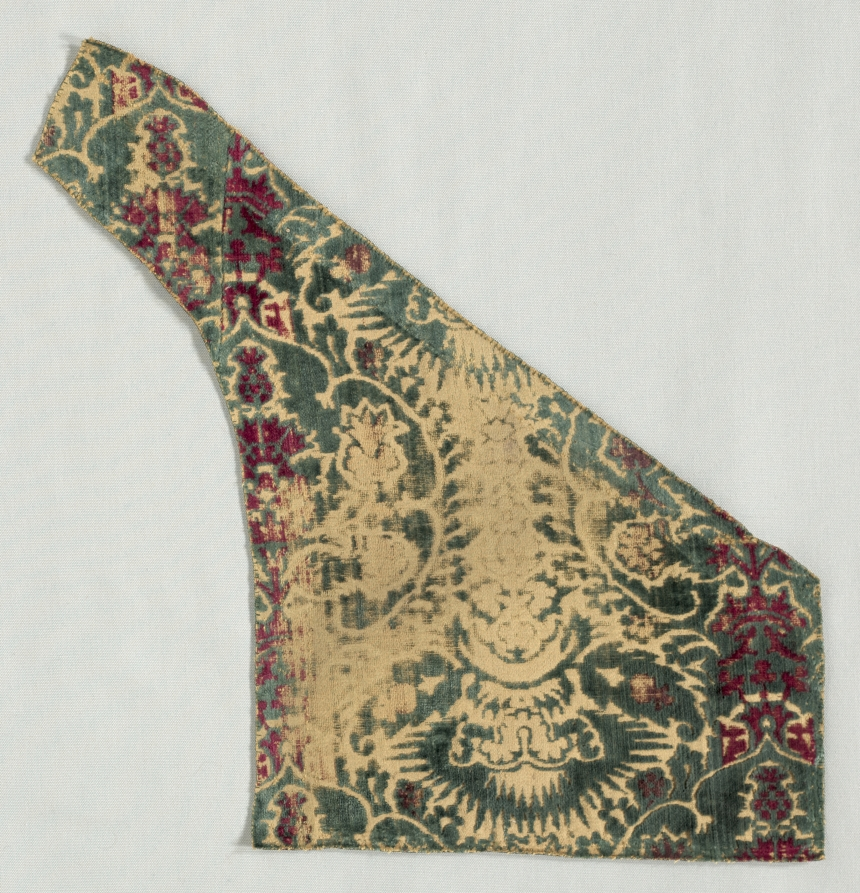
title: Velvet Fragment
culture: Italy, 15th century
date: 1400s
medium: velvet (cut and voided)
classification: Velvet